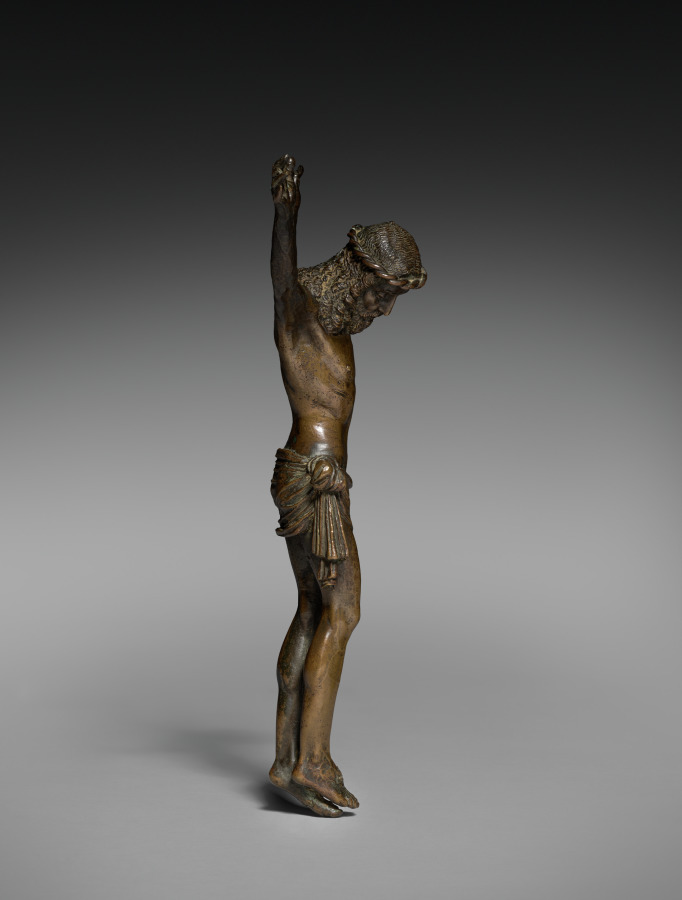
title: Crucified Christ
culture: Italy, Ravenna, 16th century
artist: Severo da Ravenna (Italian, c.1496–c.1543)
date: c. 1500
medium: bronze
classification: Sculpture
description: The highly finished surface of this sculpture, including the back, suggests it belonged to a refined collector. Small sculptures would often be held to admire details such as the strands of hair streaming onto Christ’s shoulders, the prominent veins in his forearms, and the intricate knotted cloth at his side.